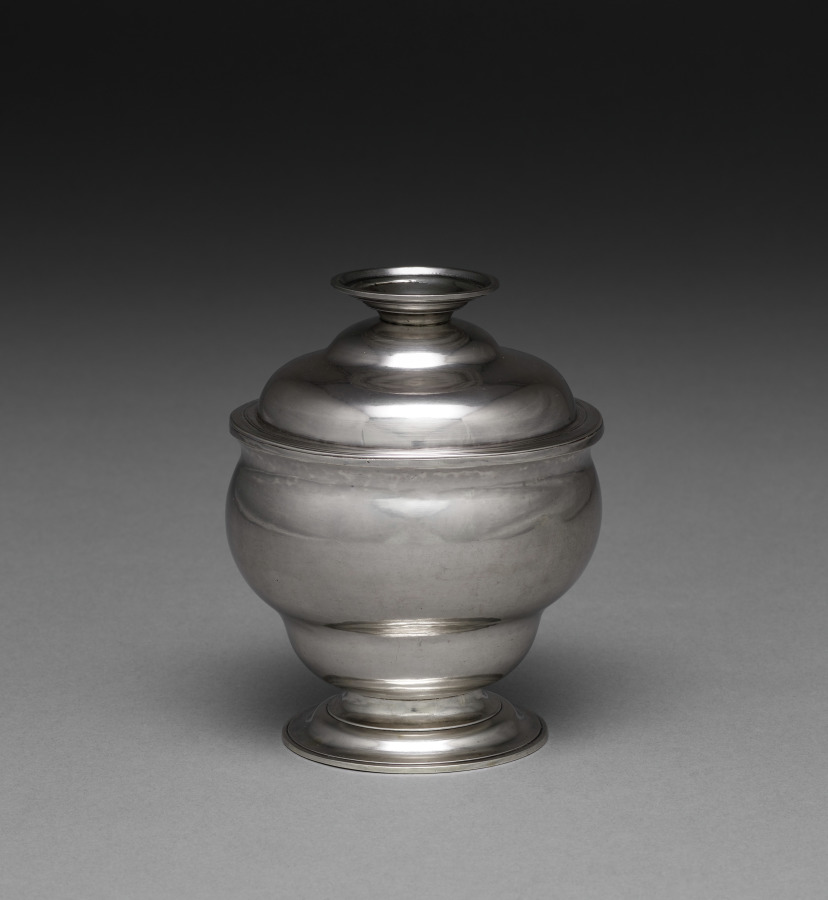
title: Covered Sugar Bowl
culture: America, Massachusetts, 18th century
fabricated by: Thomas Lynde (American, 1748–1811)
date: c. 1770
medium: silver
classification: Silver